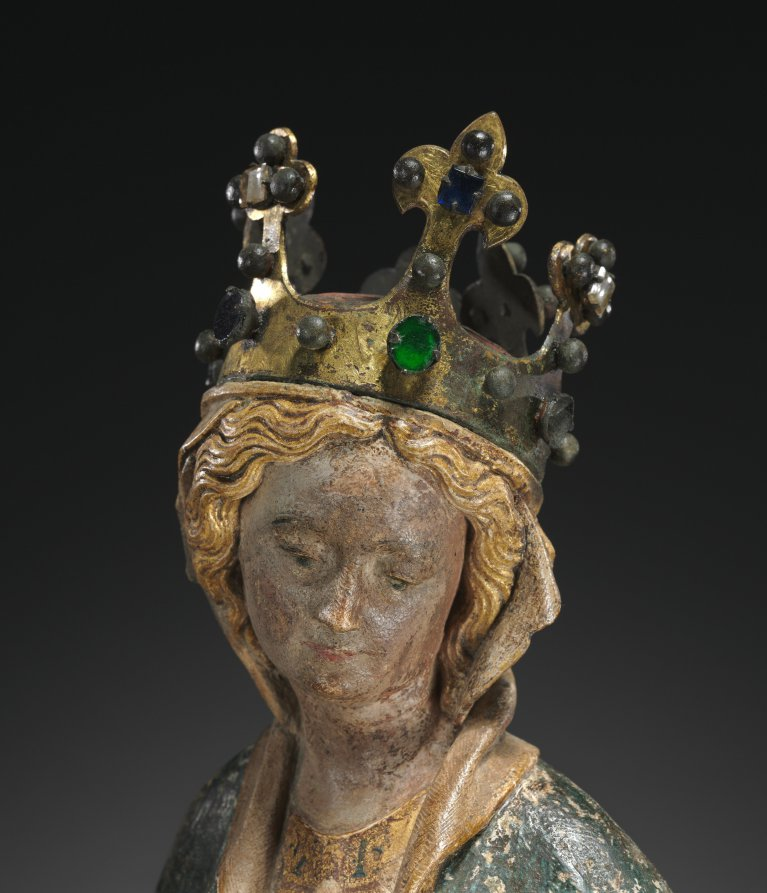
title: Enthroned Virgin with the Writing Christ Child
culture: Franco-Netherlandish, active Paris(?), 15th century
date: c. 1400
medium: limestone with polychromy and gilding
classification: Sculpture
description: This sculpture belongs to a tradition of seated Virgins that were prominent in Netherlandish art in the decades around 1400, and by extension may be associated with the Valois courts at Paris, Dijon, and Bourges. The theme of the Christ child who writes into an open book or onto a vellum banderole emerged during the third quarter of the 14th century and had great appeal among ecclesiastical and aristocratic clients. It undoubtedly refers to the educating and nurturing role of the mother in teaching the child, but also to the future position of the adult Christ as author and teacher. The small scale of this sculpture and the fact that its back is uncarved suggest that it was made for a small alcove or niche, appropriate in the intimate setting of a small chapel or oratory. The sculpture would have primarily been viewed from the front and perhaps from slightly below.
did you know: Here the Virgin is sitting on a highly decorated pillow.